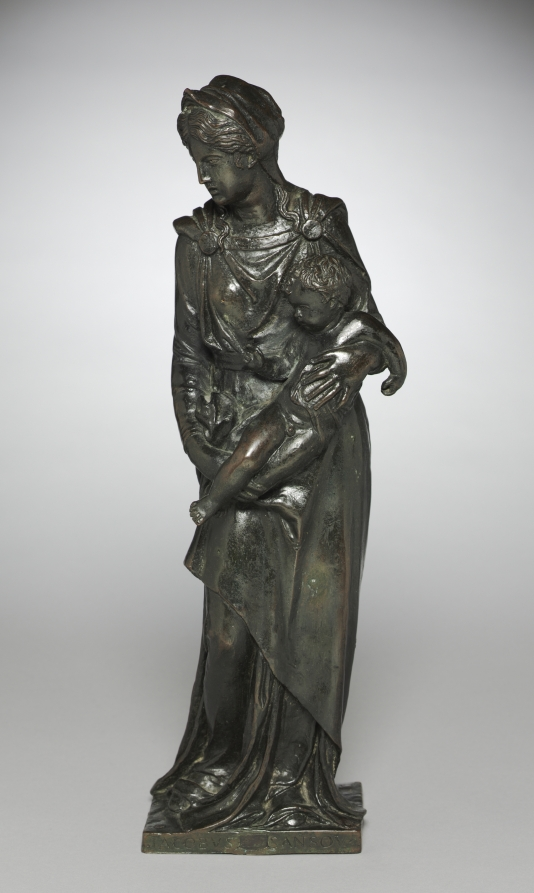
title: Virgin and Child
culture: Italy, 16th century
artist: Jacopo Sansovino (Italian, 1486–1570)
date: early 1530s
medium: bronze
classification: Sculpture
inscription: inscribed across the front of the base: IACOBVS SANSOV.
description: This statue is a scaled-down version of a marble figure the sculptor and architect Jacopo Sansovino carved for the funerary monument of a nobleman in Verona, Italy. Balancing the stable mass of the Virgin with the seemingly weightless, elongated child draped gracefully across her torso, the composition illustrates Sansovino’s skill. After training in Florence, he relocated to Rome before eventually settling in Venice in 1527. Sansovino contributed significantly to public and private projects across the region, from important civic buildings and tomb sculpture to intimately scaled bronzes, such as this example from his early Venetian period.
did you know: Sansovino's signature on the base—uncommon for bronzes of this period—marks this as a work of particular importance.